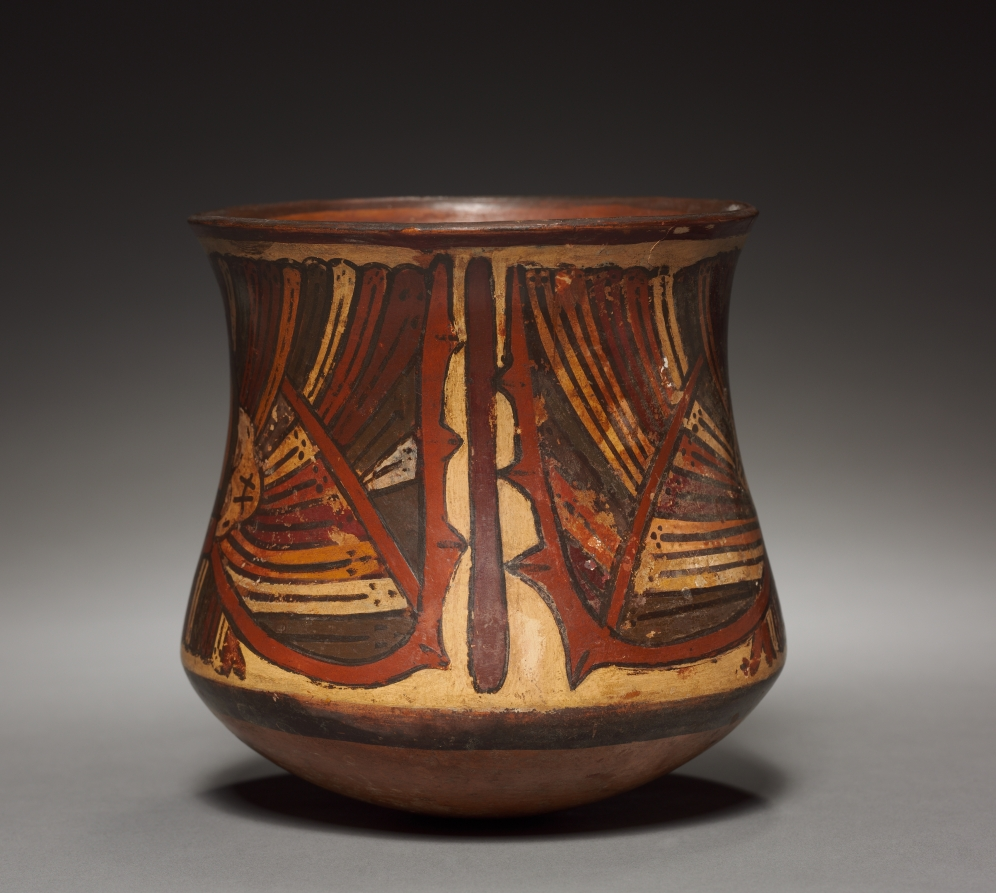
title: Vase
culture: Peru, South Coast, Nasca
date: 2000–20 BCE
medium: pottery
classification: Ceramic